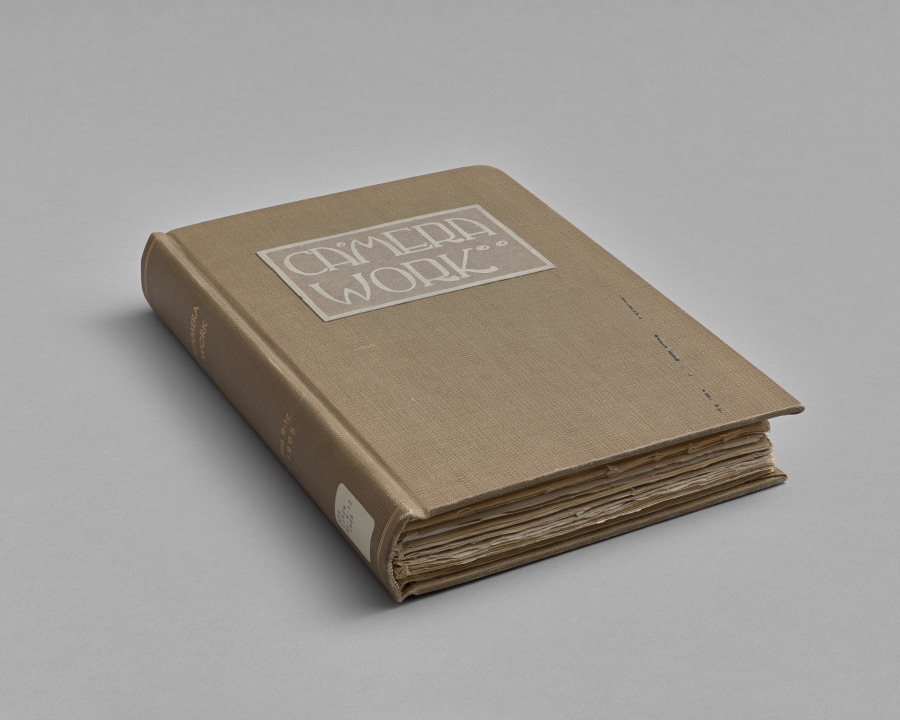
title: Camera Work: Number 10, April 1905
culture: 20th century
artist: E.M. Bane (American)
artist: Gertrude Käsebier (American, 1852–1934)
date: 1905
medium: photogravure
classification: Bound Volume